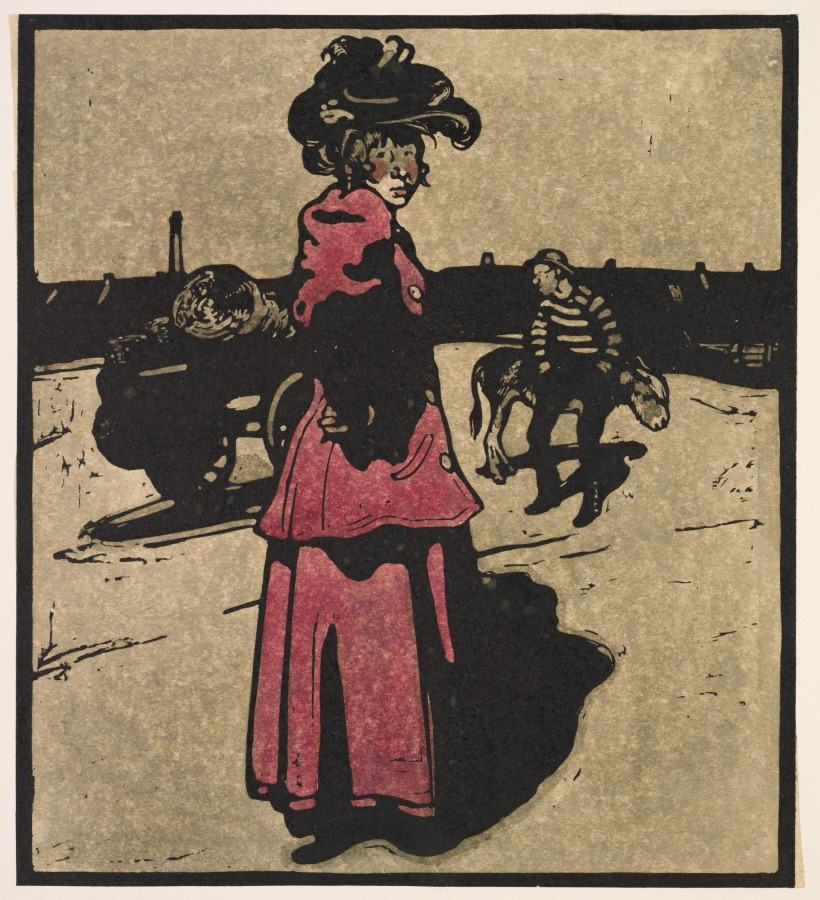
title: London Types: Coster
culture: England, 19th century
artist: William Nicholson (British, 1872–1949)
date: 1898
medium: woodcut hand-colored with watercolor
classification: Print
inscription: lower left margin, in black ink: William Nicholson - 1898 -